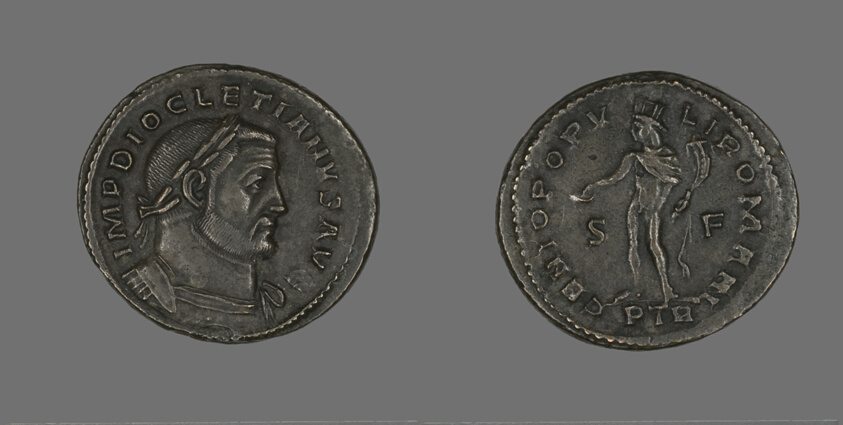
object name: Coin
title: Coin Portraying Emperor Diocletian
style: imperial (roman), ancient, roman (ancient, style or period)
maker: Roman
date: 284-305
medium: Bronze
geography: Roman Empire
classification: coin; ancient art